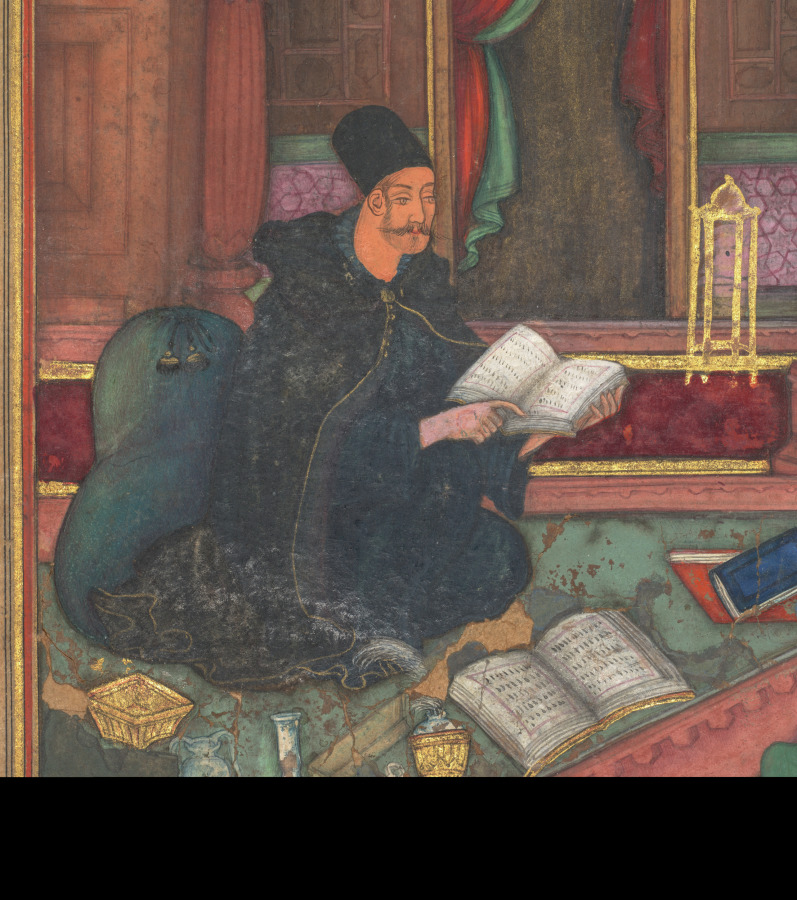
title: John the Baptist recognizes Christ by the appearance of a dove (folio 50 verso), from a Mirror of Holiness (Mir’at al-quds) of Father Jerome Xavier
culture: Mughal India, Allahabad, made for Prince Salim (1569–1627)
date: 1602–4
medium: Gum tempera, ink, and gold on paper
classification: Manuscript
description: Wearing the black robes and cap of a Jesuit priest, John the Baptist sits in a well-appointed Mughal-style courtyard. According to Father Jerome’s text, John recognizes Jesus by the dove who sits on his head. Possibly Father Jerome intended to relate the Gospel account that describes the dove of the Holy Spirit as hovering in the air above his head. The artist’s own reactions to this passage may be reflected in the expressions and gestures of the onlookers, who seem incredulous and bemused at this sign.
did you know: Jesus holds a rosary with a cross even in scenes prior to his crucifixion.